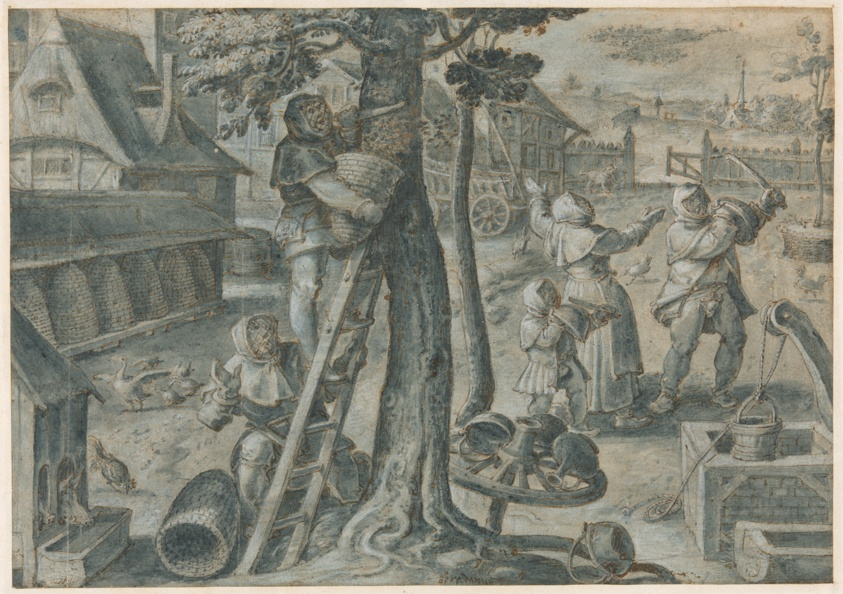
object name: Drawing and Watercolor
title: The Capture of a Swarm of Bees in a Farmyard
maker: Joannes Stradanus, called Giovanni Stradano; Flemish, 1523-1605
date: 1578/1605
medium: Pen and brown ink and blue watercolor, with opaque white watercolor, over black chalk, on cream laid paper, incised with a stylus for transfer, laid down on cream laid paper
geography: Flanders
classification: pen and ink drawings; prints and drawing; paper